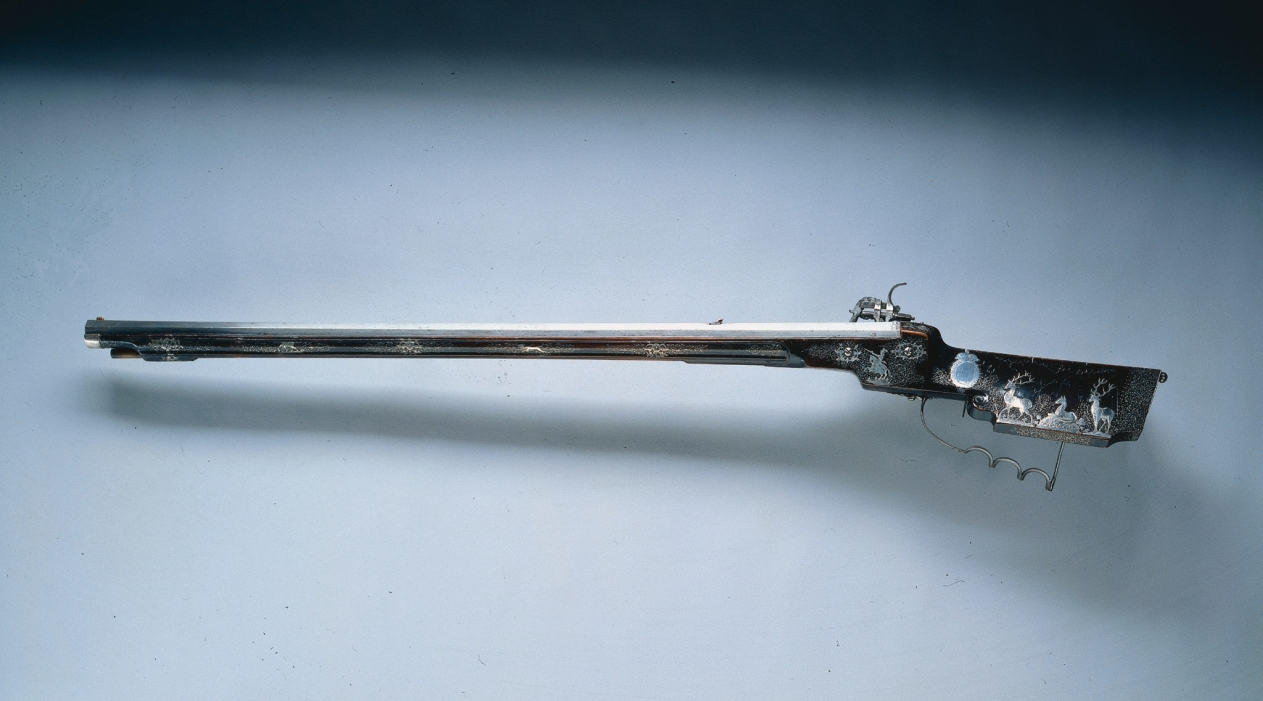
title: Wheel-Lock Hunting Rifle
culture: Austria, Ferlach, mid 17th Century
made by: Hans Schmidt (Austrian, 1669)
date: mid-1600s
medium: steel, varnished wood (walnut) stock decorated with inlaid silver wire and appliqués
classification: Arms and Armor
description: The barrel of this hunting piece is marked with the letters "GS" within a shield, the likely initials of the owner, who was probably a member of the Order of the Golden Fleece as indicated by the escutcheon on the stock.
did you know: A similar rifle made for another member of the Order of the Golden Fleece, Graf Sigmund von Dietrichstein, is preserved in Vienna.